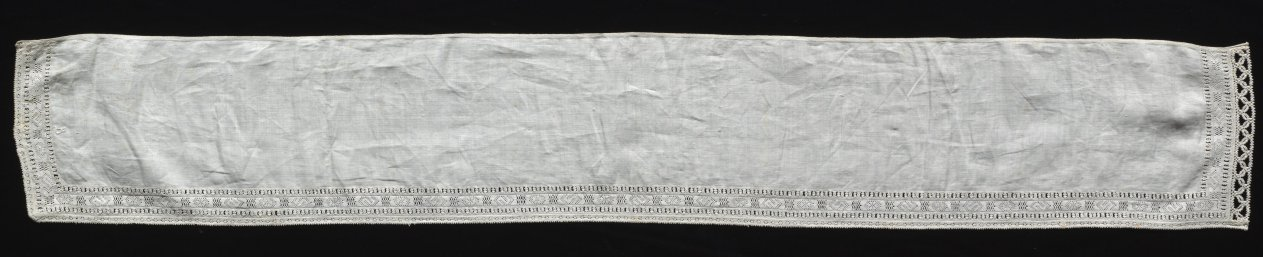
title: Swaddling Band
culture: Italy, Venice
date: 1540–60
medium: Linen: needle lace (drawnwork) and bobbin lace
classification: Lace